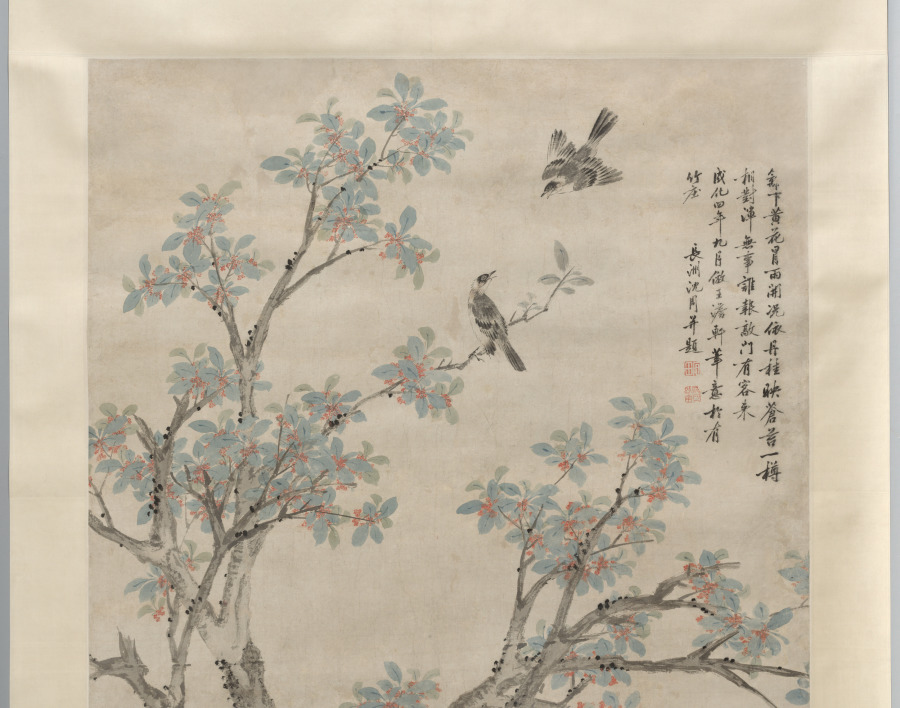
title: Yellow Chrysanthemums and Red Osmanthus in the Style of Wang Yuan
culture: China, Ming dynasty (1368–1644)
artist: Shen Zhou (Chinese, 1427–1509)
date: 1468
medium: hanging scroll, ink on paper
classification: Painting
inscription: Artist's inscription, signature, and 2 seals at upper right: Beneath the fence yellow [chrysanthemum] flowers brave the rain to blossom;/ Still others lean on the red osmanthus tree and dazzle the deep green moss./ With a goblet [of wine] I face them, entirely without concern;/ Who will answer the knocking at the gate where a guest has arrived? In the ninth month of the fourth year of the Chenghua era [1468], I followed the brush-conception of Wang Danxuan 王澹軒 [Wang Yuan 王淵] at the Youzhuzhuang 有竹庄 [House with Bamboo]. Inscribed and [painted] by Shen Zhou 沈周 of Changzhou 長洲. [seals] Shitian 石田; Shen shi Qinan 沈氏启南. trans. HR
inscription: 1 additional inscription, dated 1523, and 2 seals of Wang Chong 王寵 (1494-1533).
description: Shen Zhou, a native from Suzhou, was descended from a prominent land-owning family with strong ties to literati culture. Because Shen Zhou never entered government service, he had ample opportunity to cultivate the arts of painting, poetry, and calligraphy. Chrysanthemums and red osmanthus both bloom in autumn. The deep orange osmanthus flowers emanate a characteristically sweet fragrance. According to his inscription on the painting, Shen Zhou sought to imitate the style of the Yuan dynasty (1271–1368) painter Wang Yuan. His color-filled brushstrokes and washes, however, anticipate the flower painting style of Yun Shouping, whose Peonies are also in the Cleveland Museum of Art collection, https://www.clevelandart.org/art/1967.192. The sheer size and complex composition of this scroll are impressive.